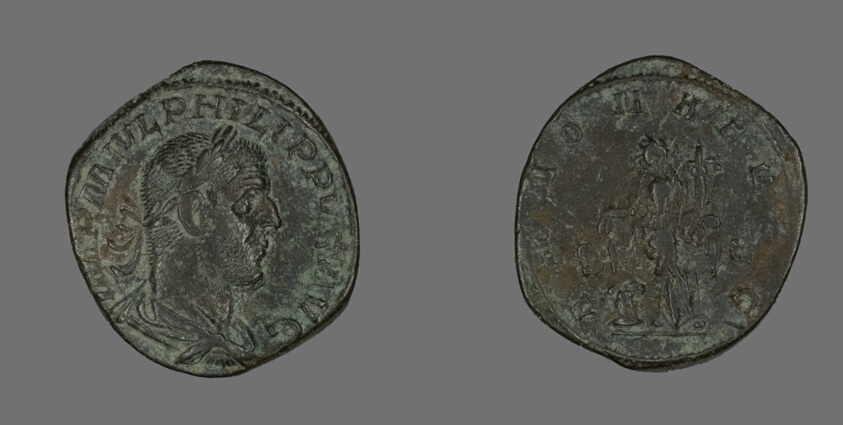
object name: Coin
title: Coin Portraying Philip the Arab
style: roman (ancient, style or period), ancient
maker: Roman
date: 244-249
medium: Bronze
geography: Roman Empire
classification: coin; ancient art